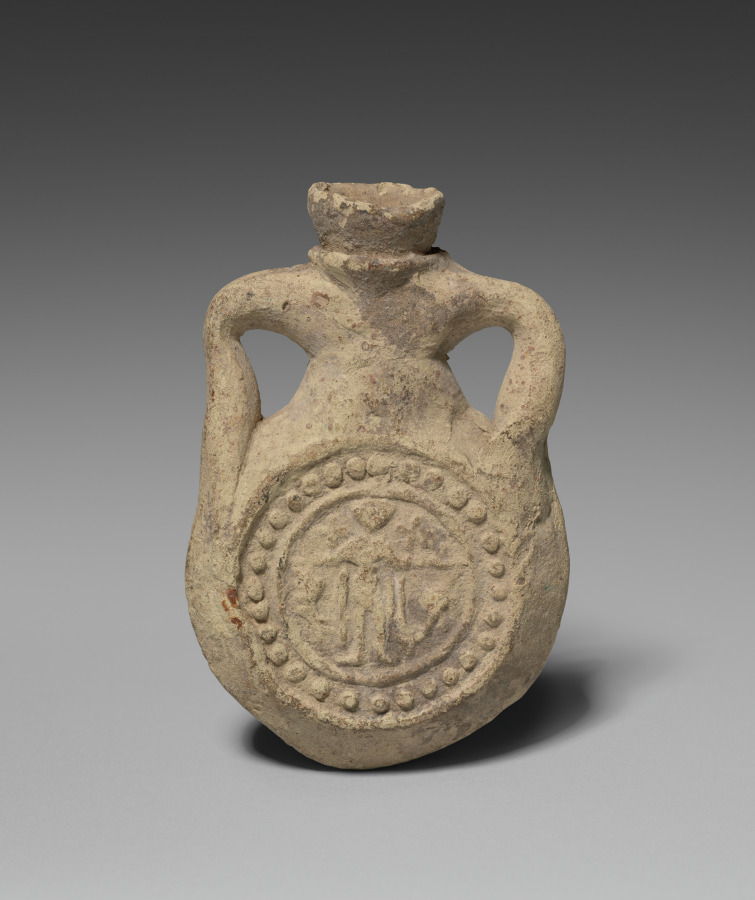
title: Pilgrim's Flask with Saint Menas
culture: Byzantine Empire, Abu Mena (Egypt)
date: 400–600 CE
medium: terracotta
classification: Ceramic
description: These flasks bear the image of Saint Menas, an early martyr of the Christian Church whose shrine was in the desert southwest of Alexandria in Egypt. These flasks were probably used by pilgrims to hold oil taken from the lamp that burned over this saint's tomb. Probably manufactured near the shrine, pilgrim's flasks often bear decorations hinting at their place of origin, as is the case here.